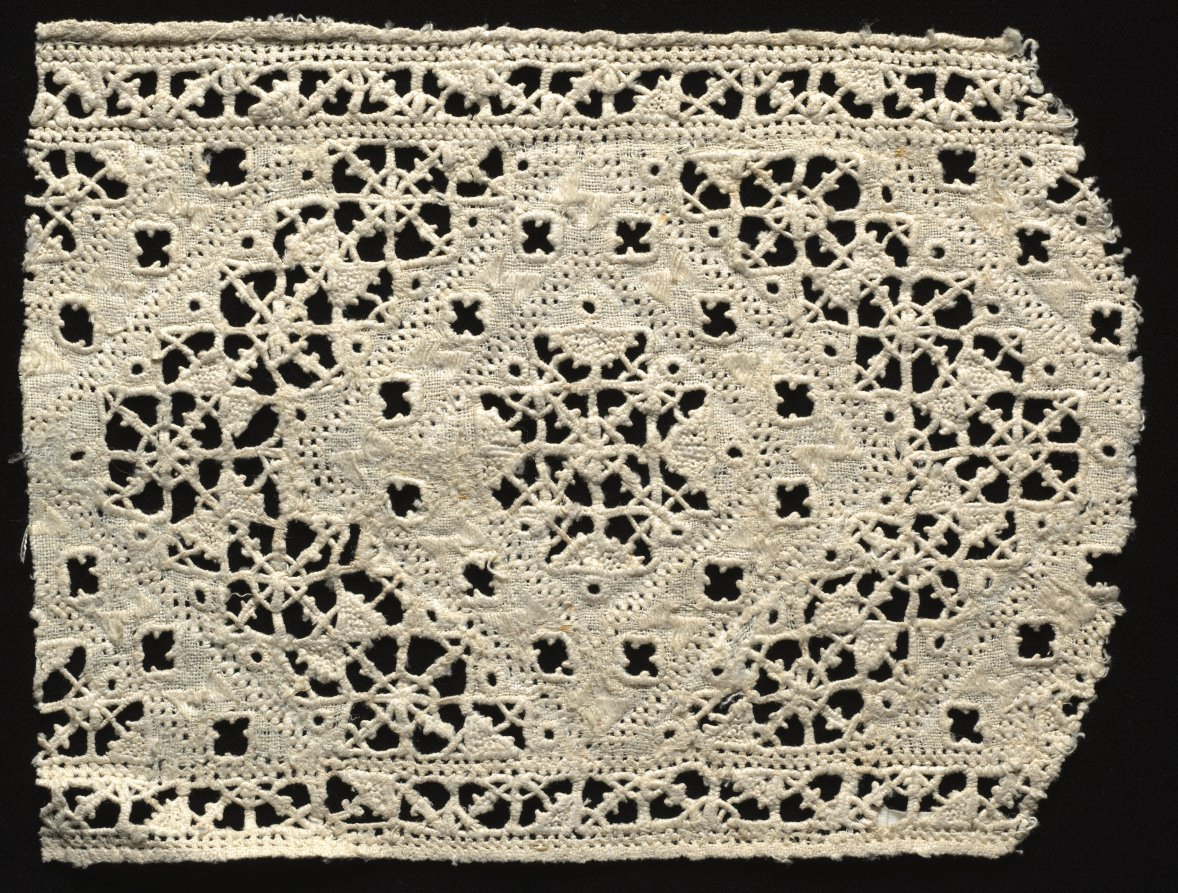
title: Lace fragment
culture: Italy, Venice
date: 1500s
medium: Linen: needle lace (cutwork) insertion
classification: Lace